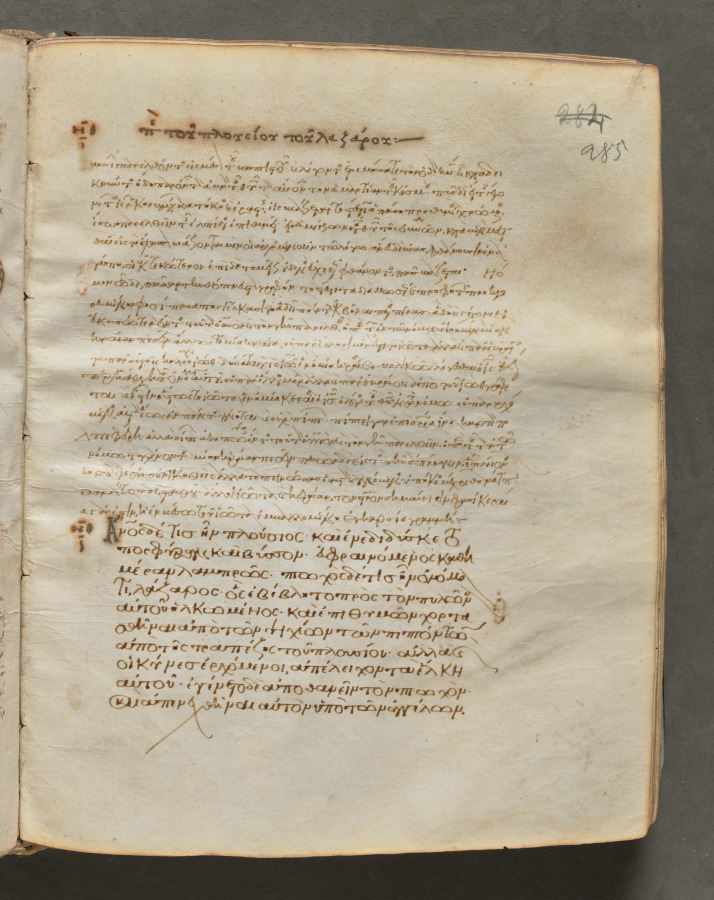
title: Text, folio 285 (recto), from a Gospel Book with Commentaries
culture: Byzantium, Constantinople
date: c. 1000–1100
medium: ink, tempera, and gold on vellum; leather binding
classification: Bound Volume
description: Each of the four gospels in this book opens on a page with brilliantly illuminated borders depicting the author of the text as well as birds—principally peacocks, symbols of the immortality of the soul—and fountains, representing the fountain of life and the salvation of the soul. This volume consists of 428 leaves with texts in Greek. Its level of sophistication suggests that it was probably written and decorated in a monastery in Constantinople.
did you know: Gospel books were carried in procession through Byzantine churches.